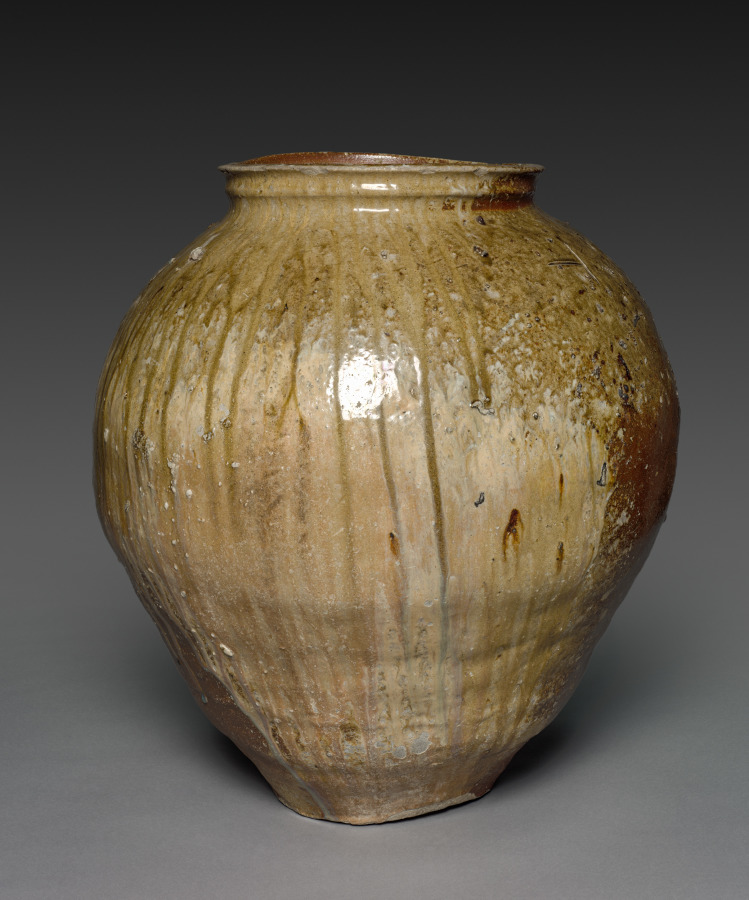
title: Storage Vessel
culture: Japan, Muromachi period (1392–1573)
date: 1400s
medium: stoneware with natural ash glaze (Echizen ware)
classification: Ceramic